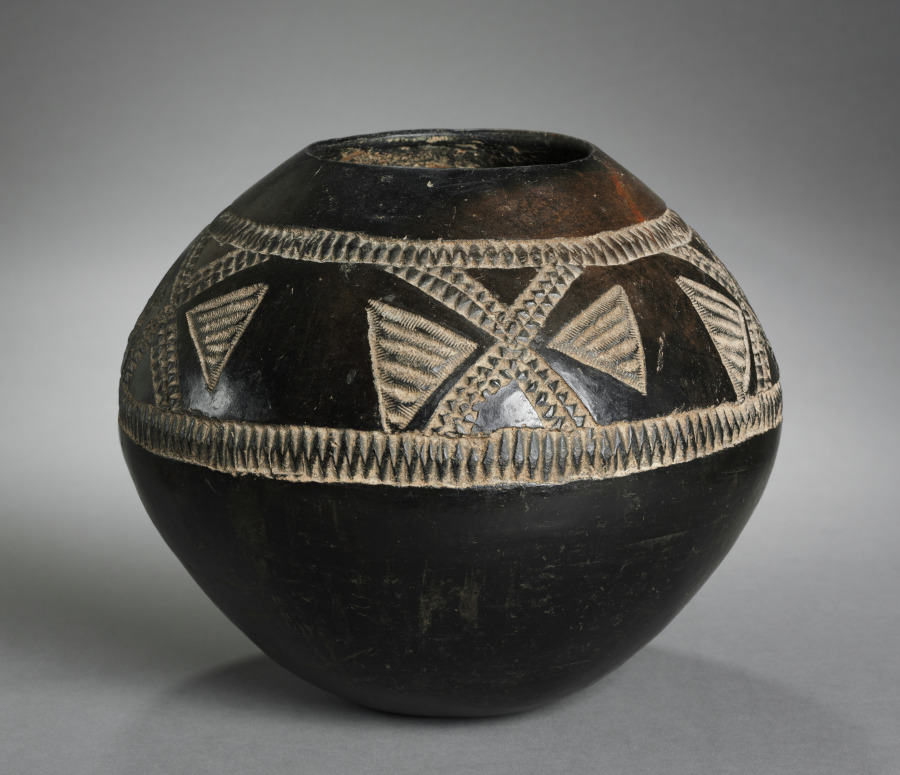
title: Pot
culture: Southern Africa, South Africa, Zulu-style potter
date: 1900s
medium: Terracotta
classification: Vessels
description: Within the Zulu culture (the Northern Nguni tribe), the making of beer pots is the traditional function of women. A potter will travel far searching in riverbeds or for anthills that can supply the correct clay for the vessels. Formed using the coil technique and smoothed using flattened stones, the pots are fired in a dug-out earthen "kiln," and covered with palm leaves, whose oil results in the blackened, shiny texture of the vessels. Years of use deepen this texture to a rich woody patina.